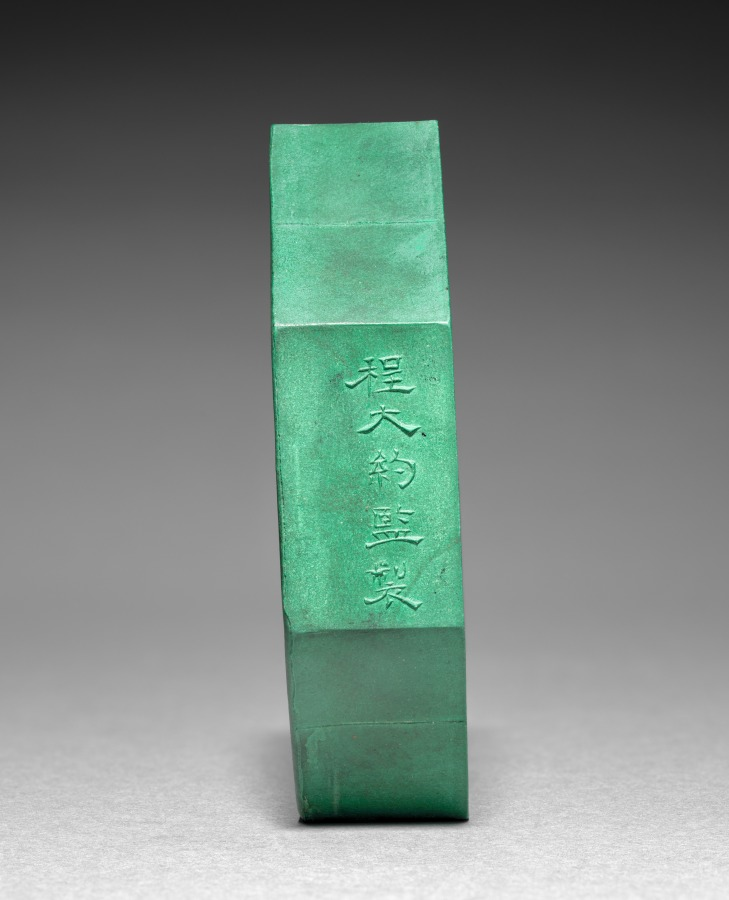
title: Octagonal Ink Cake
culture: China, Ming dynasty (1368–1644)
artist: attributed to Cheng Junfang (Chinese, active c. 1570-c. 1624)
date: 1622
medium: green ink cake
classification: Miscellaneous